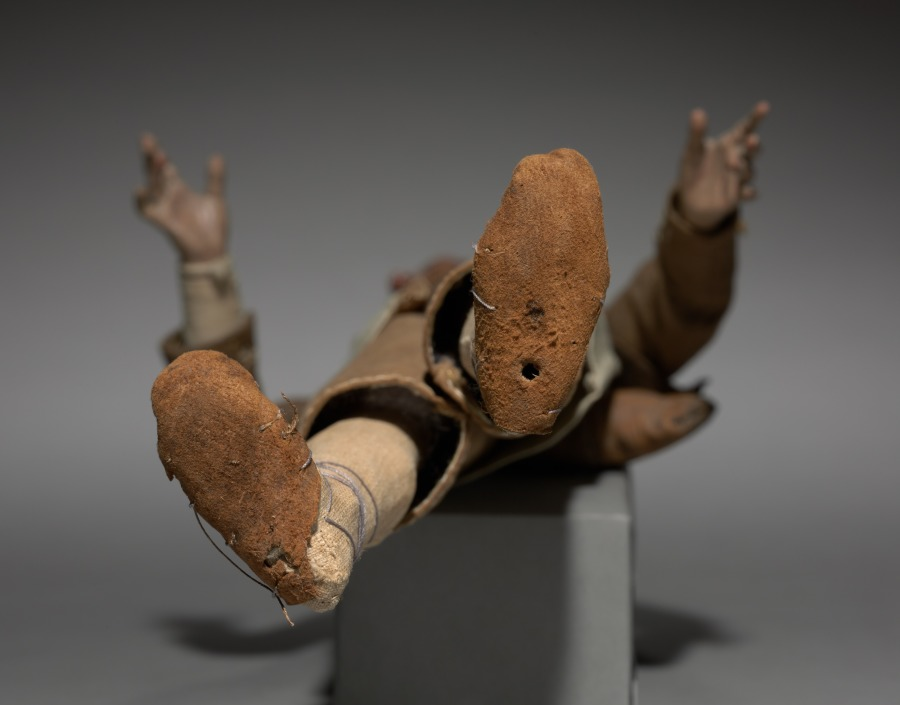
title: Figure from a Crèche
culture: Italy, Naples, late 18th-early 19th century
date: 1780–1830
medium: painted wood and terracotta with various textiles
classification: Sculpture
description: The practice of creating scenes of the Nativity for the home dates from the early 1700s in Italy, where people began to set up doll-like figures of about a foot or less in height. The custom was particularly popular in Naples around 1800, where crèche scenes (crèche means cradle, or crib) included many figures, whose heads and hands of painted terracotta, stuffed cloth bodies, and clothing adapted from contemporary local costumes gave them an amazingly realistic character. Representations of the birth of Jesus can be traced to the first few centuries of Christianity. Both living creatures and sculptural depictions of them were used from early times. By the late middle ages it was customary to create life-size figures of wood or stone, naturalistically painted, to represent the characters who participated in the events of Jesus's early life. These sculptures were then arranged in scenes illustrating one or both of the most important of these events, the Adoration of the Shepherds and the Adoration of the Magi-the three kings from the East who came to pay homage to the Christ child. Used in churches, these large figures were especially popular in Italy, Central Europe, Spain, and Portugal.